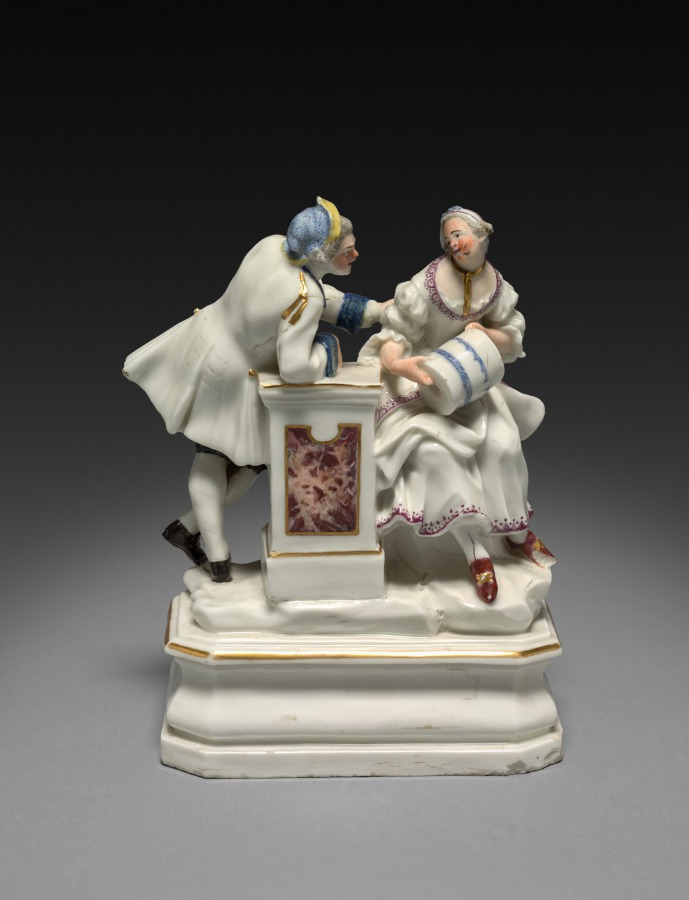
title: Woman and Man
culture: Italy, Naples, Capo di Monte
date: c. 1750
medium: porcelain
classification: Ceramic